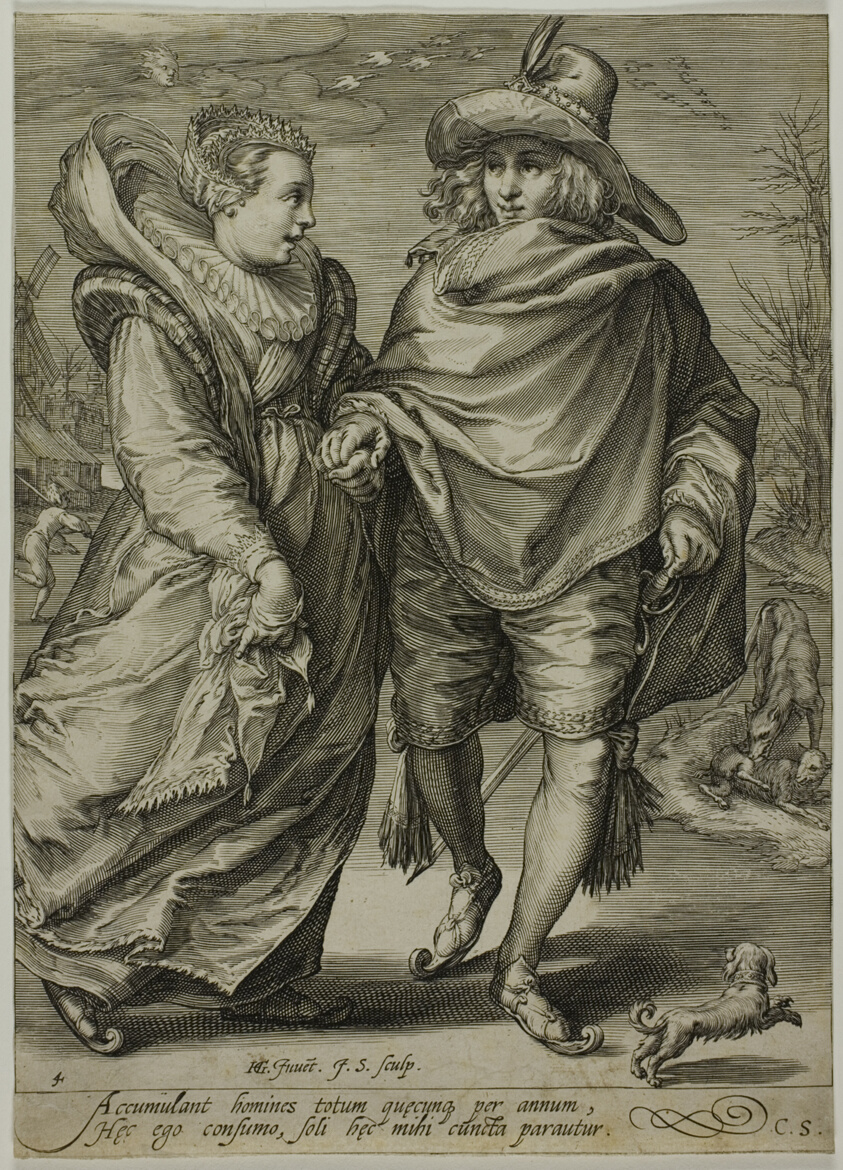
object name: Print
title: Winter, from The Four Seasons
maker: Jan Saenredam (Dutch, 1565-1607)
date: 1601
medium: Engraving on cream laid paper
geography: Netherlands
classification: engraving; print; prints and drawing